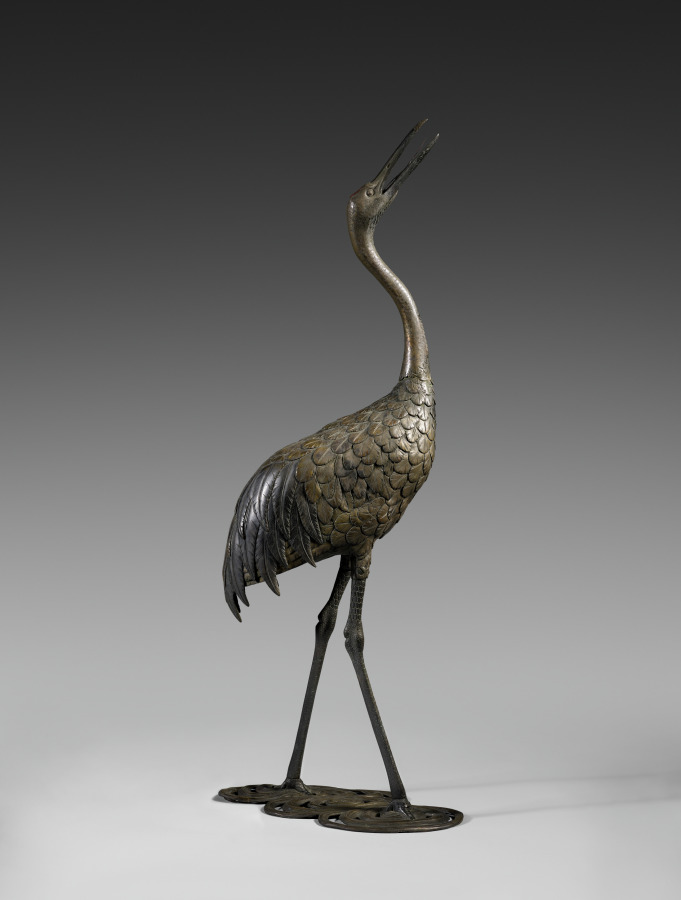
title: Crane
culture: Japan, Taishō period (1912–26) to Shōwa period (1926–89)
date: early to mid-1900s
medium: bronze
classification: Sculpture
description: This crane stands in water swirling around its feet, suggesting that it may have been intended for an interior setting without real water. Cranes symbolize longevity in East Asia, where they are said to live a thousand years. Representations of cranes are found across the centuries in cast metal form in Japanese religious settings. They are depicted as surface motifs on sacred objects, such as ritual mirrors, or as crane-shaped ornaments or incense burners. In the modern era, metal animals were made as sculptural works of art or as decorative objects for gardens.